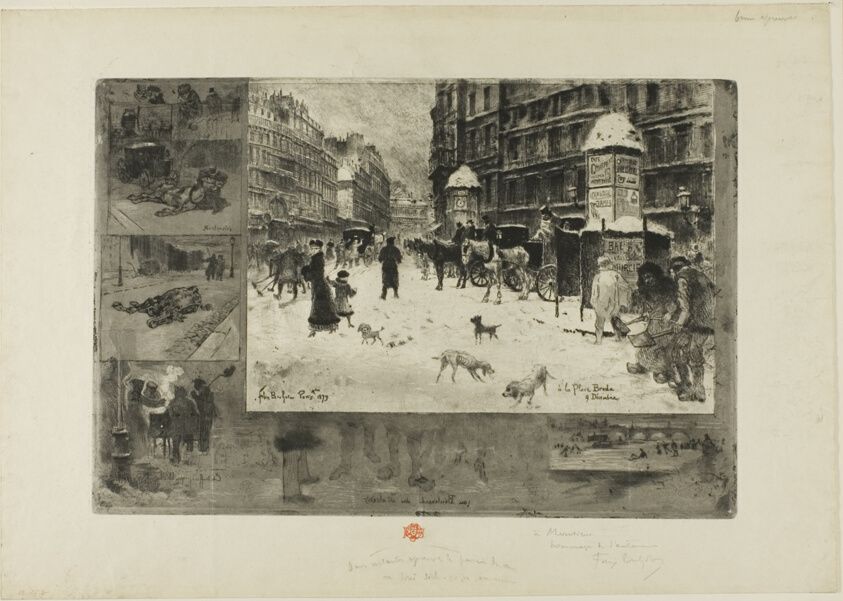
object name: Print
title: Winter in Paris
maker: Félix Hilaire Buhot (French, 1847-1898)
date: 1879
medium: Etching, roulette and aquatint on ivory Japanese paper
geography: France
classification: etching; print; prints and drawing